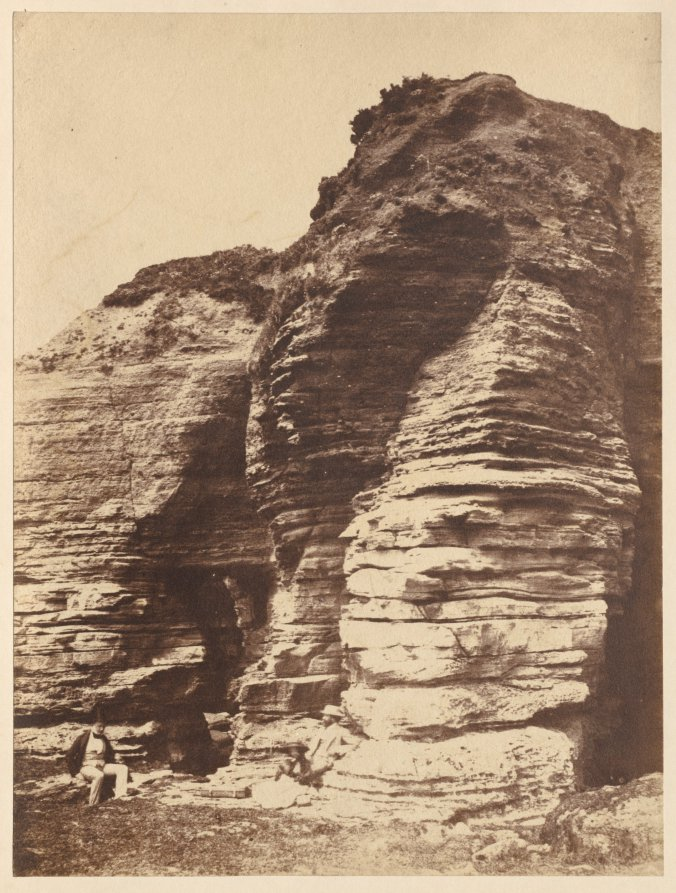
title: Rocks at Livermead near Torquay (England)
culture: England, 19th century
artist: attributed to John Dillwyn Llewelyn (British, 1810–1882)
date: c. 1852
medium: salted paper print from calotype negative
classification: Photograph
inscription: Written in pencil on verso: "Rocks at Livermead / Torquay"